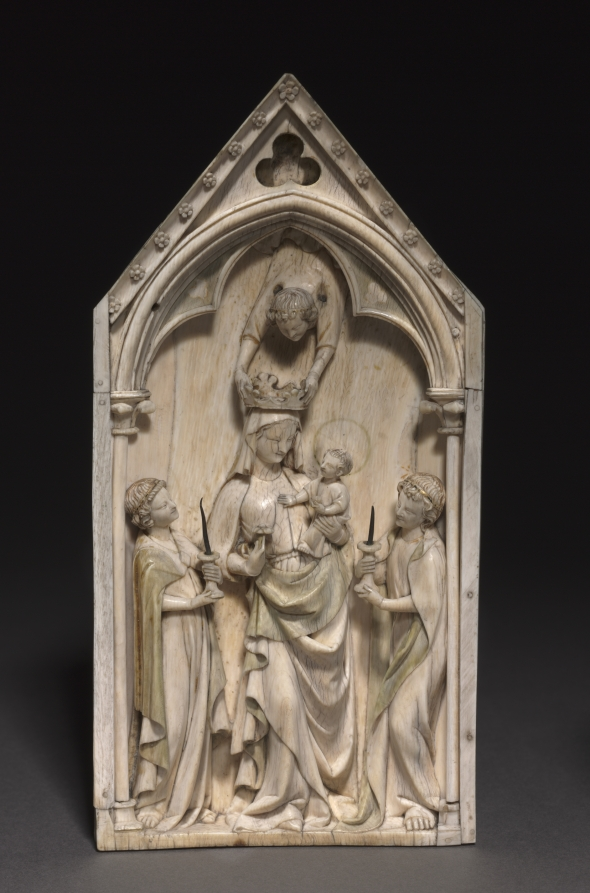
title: Plaque: The Virgin and Child with Angels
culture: France, Paris, Gothic period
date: c. 1320–1330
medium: ivory, traces of paint and gilding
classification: Ivory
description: This plaque once formed the center of an ivory triptych, a devotional object consisting of three panels hinged together. While two standing angels with candlesticks flank the enthroned Virgin on either side, a third angel descends from above to crown the Virgin as Queen of Heaven.